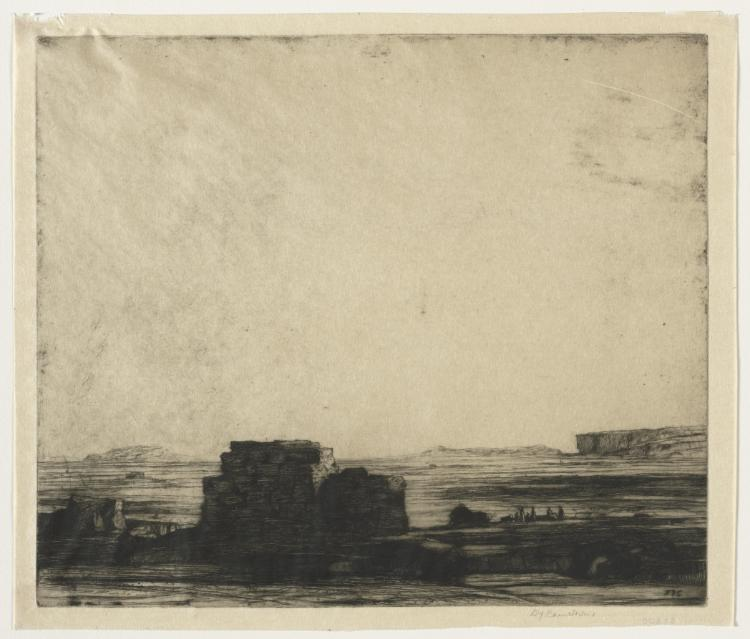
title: The Desert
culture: England, 20th century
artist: David Young Cameron (British, 1865–1945)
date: 1909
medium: etching and drypoint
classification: Print